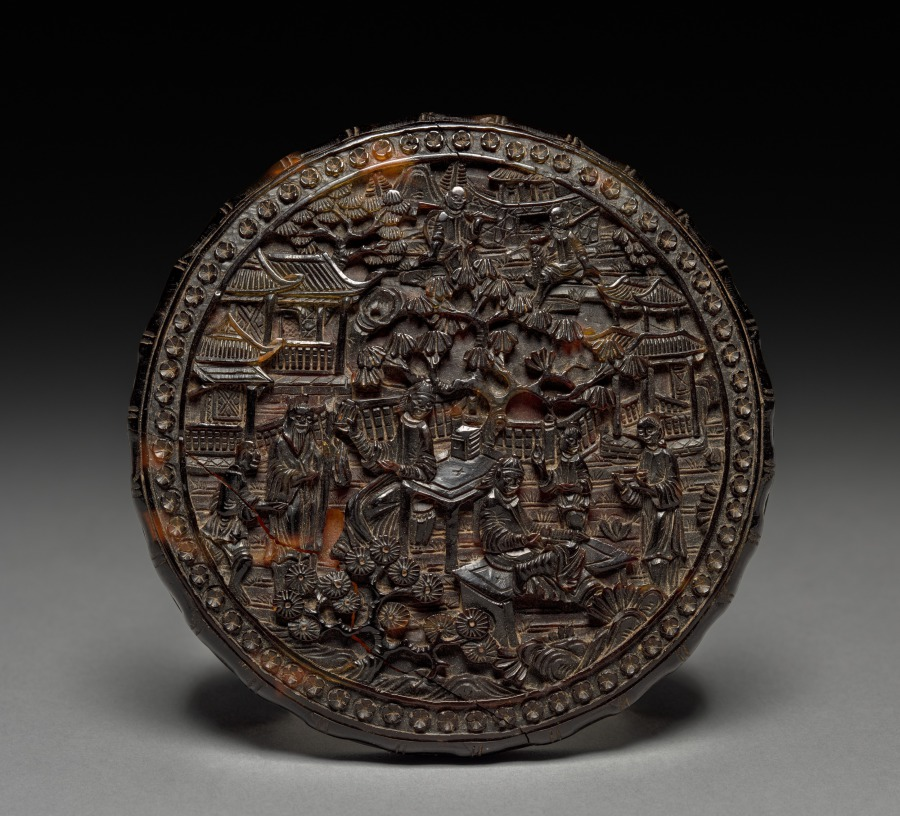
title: Fragrance Box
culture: China, Qing dynasty (1644-1911)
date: 1700s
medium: tortoiseshell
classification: Miscellaneous